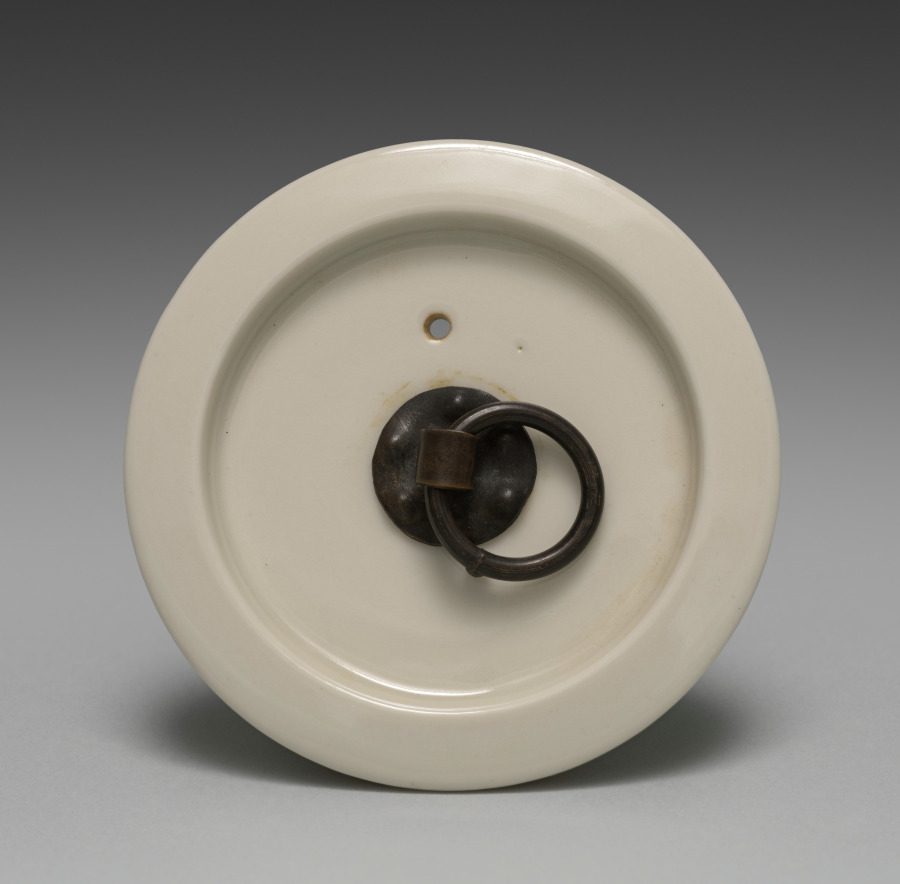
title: Lid for a Teapot with Ruyi Motifs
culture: Japan, Meiji period (1868–1912)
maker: Seifū Yohei III (Japanese, 1851–1914)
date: 1893–1914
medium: Porcelain with molded design and iron handles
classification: Ceramic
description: The simple, round form of this teapot is embellished with only a pair of nyoi staff-head motifs, one on each side. Two arched iron handles, parallel to each other, are hooked through holes in raised tabs at the front and back of the shoulders of the pot. The round lid is depressed so that an iron ring handle fastened with an iron clamp passing through the lid can lie flat inside the recessed area. The box is not original to the piece and has an inscription dated to 1960. The person who wrote it clearly admired Yohei III and his efforts to produce works that resembled Chinese ceramics. The inscription describes Yohei’s journey to perfecting these copies but misidentified the Chinese kiln whose wares were the basis for this particular work.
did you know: The base of the pot has a “Seifu” seal.